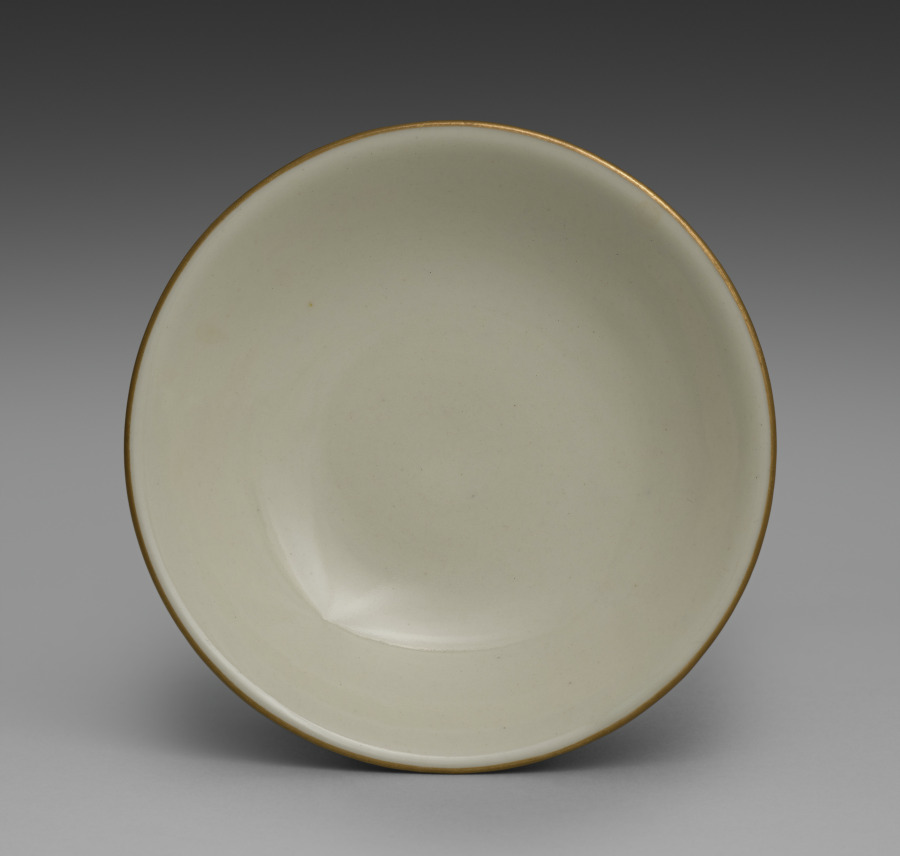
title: Cover for a Bowl from Dining Set with Plum Blossoms and Cracked-Ice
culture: Japan, Meiji period (1868–1912)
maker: Seifū Yohei II (Japanese, 1844–1878)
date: c. 1875–78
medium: Porcelain with molded designs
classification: Ceramic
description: Each item in this set has a delicate low-relief design of flowering plum branches over scattered, intersecting lines meant to resemble the cracked-ice surface of a frozen body of water and is signed on the base in gold pigment. While Yohei II produced many fine works in underglaze blue, like those produced by Kiyomizu Shichibei, he also made works in quite different styles later in his career, from the early 1870 s. In 1873, he was appointed purveyor to the Industrial Center of Kyoto Prefecture, a designation associated with Kyoto’s efforts to reach an international market through the port of Kobe; and from 1875 until his death, he was involved in national-level projects to present Japanese ceramics across the world. It was during this period that Yohei III was apprenticed to Yohei II, and it has been suggested that this set may in fact be an early example of Yohei III’s work, which he signed with his teacher’s name. Decorated with flowers resembling Japanese textile motifs, the set calls to mind the design of Yohei II’s pair of vases with plum blossoms in the Victoria and Albert Museum. Here, the elaborate trees created for a formal public exhibition setting have been translated into the approachable blossoms of the genteel domestic environment. While the designs are consistent across the pieces, each raised flower petal and pistil and each incised line in the ice was done by hand, so the cups, bowls, and dishes are similar yet unique. The bottoms of two boxes once identified the set’s owner, but the information has been deliberately obscured with black ink. However, inscriptions still visible appear to indicate two occasions, once at the end of July 1886 , and once again in June 1916 , when parts of the set were requested from Hokura in Niigata Prefecture. The location corresponds to a neighborhood in the present-day city of Jōetsu. The surname Tsuji 辻 also appears on a paper tag affixed to one of the box cloths. Future research may possibly reveal more about their provenance. A vase by Yohei III in a private collection combines the formal grandeur of the Yohei II vases in the Victoria and Albert Museum with the gentler design of this dining set, placing flowering plum trees against soft, scalloped-edge clouds resembling those in golden screens.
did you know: The dining wares have a creamy white coloration that the four boxes containing them identify as Korean in style.